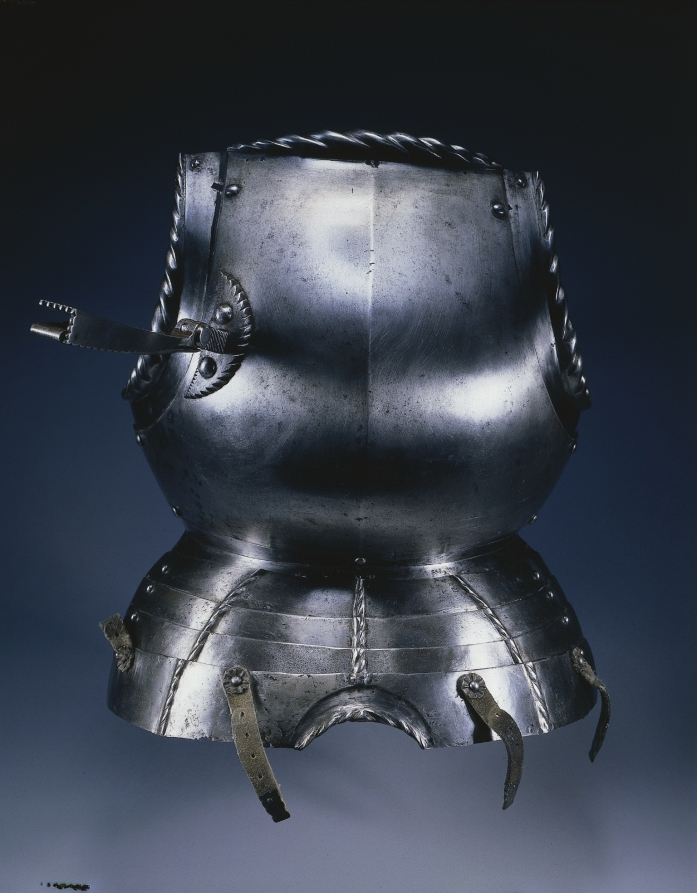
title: Breastplate (with lance rest and fauld/ Nuremberg)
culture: Germany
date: c.1510–30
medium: steel with black paint and leather straps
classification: Arms and Armor